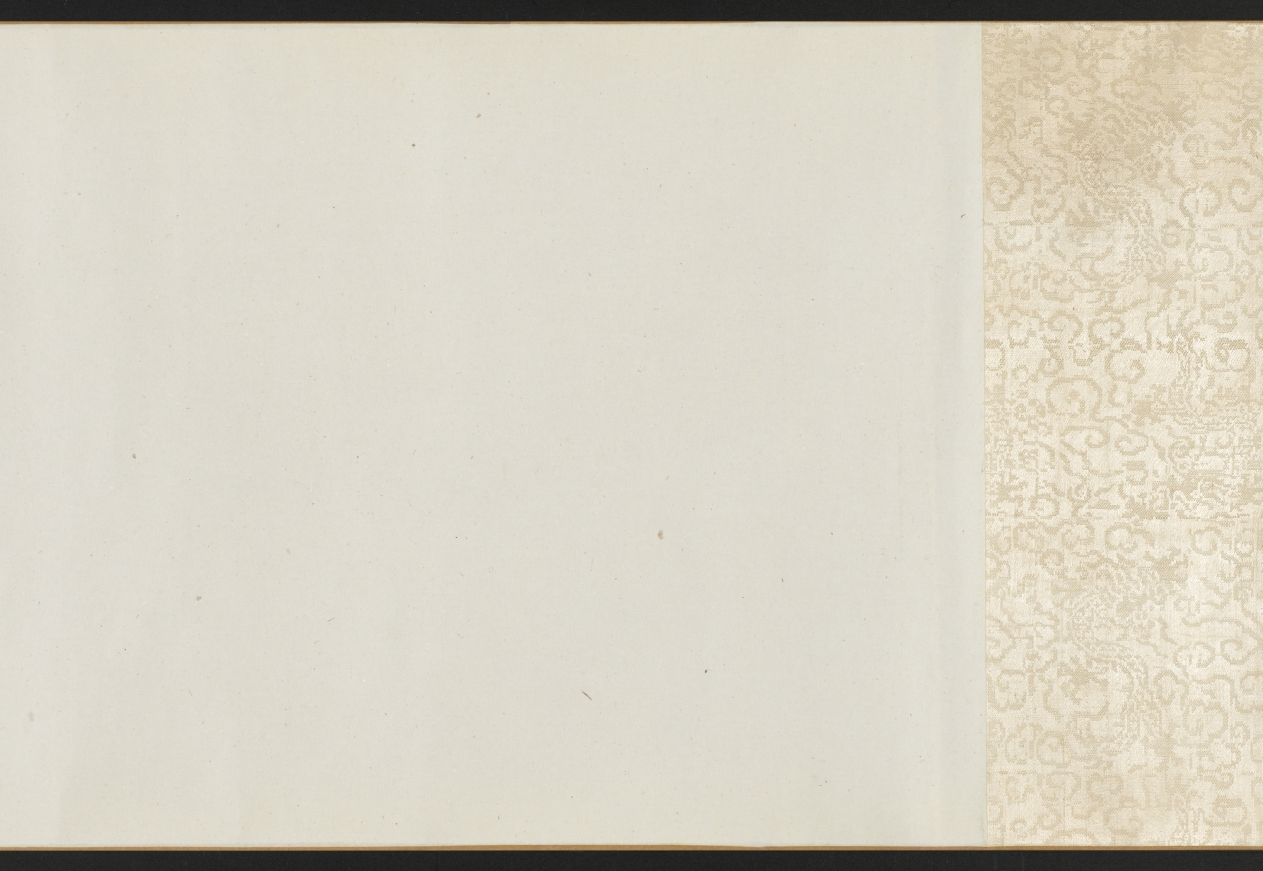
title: Scholar-Hermits in the Autumn Mountains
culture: China, Ming dynasty (1368–1644)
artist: Tang Yin (Chinese, 1470–1523)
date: 1500–1510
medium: handscroll, ink and light color on silk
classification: Painting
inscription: Artist's signature and 2 seals at end of scroll: Tang Yin [seals] T'ang Po-hu; T'ang Tzu'wei t'u-shu.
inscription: Title on frontispiece by Li Cho-kung (dates unknown).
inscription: 1 colophon and 11 additional seals: 1 colophon dated 1915 of Wu Tso-hsi (19th-20th c.); 2 seals of Gao Qifeng 高奇峰 (1889–1933); 5 seals of C. C. Wang 王季遷 (1907–2003); 4 seals unidentified.